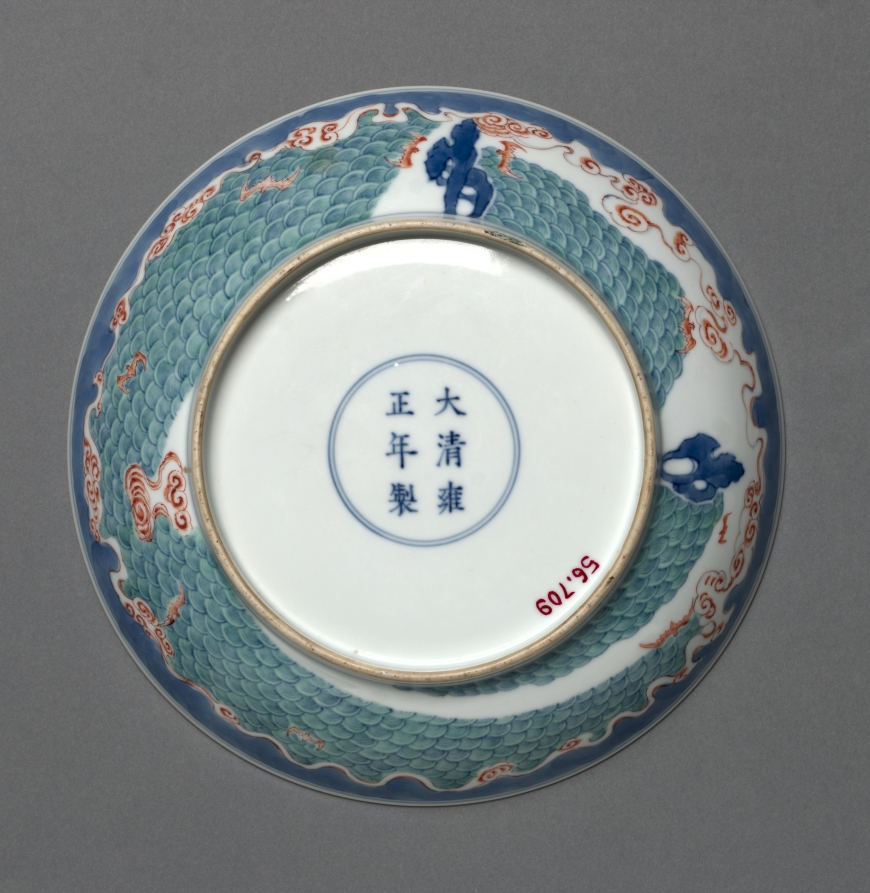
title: Plate with Isle of the Immortals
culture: China, Jiangxi province, Jingdezhen kilns, Qing dynasty (1644-1911), Yongzheng mark and reign (1723-35)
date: 1723–35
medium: porcelain decorated in underglaze cobalt blue and overglaze enamels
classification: Ceramic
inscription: 大清雍正年製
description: This multicolored dish is decorated with the sacred isle, also seen on the exterior of the blue-and-white dish nearby. A pavilion emerges amid rising and falling waves, a symbol of constant transformation and change. Above the waves are mysterious clouds, symbolizing the cosmic vital energy (qi) that animates all things and beings on earth in Daoism. The interior of the dish also shows cranes carrying sticks in their beaks, a motif that symbolizes longevity. Cranes carrying sticks above a pavilion in the sea express the wish “May you live to a ripe old age (haiwu tianchou; 海屋添籌).”